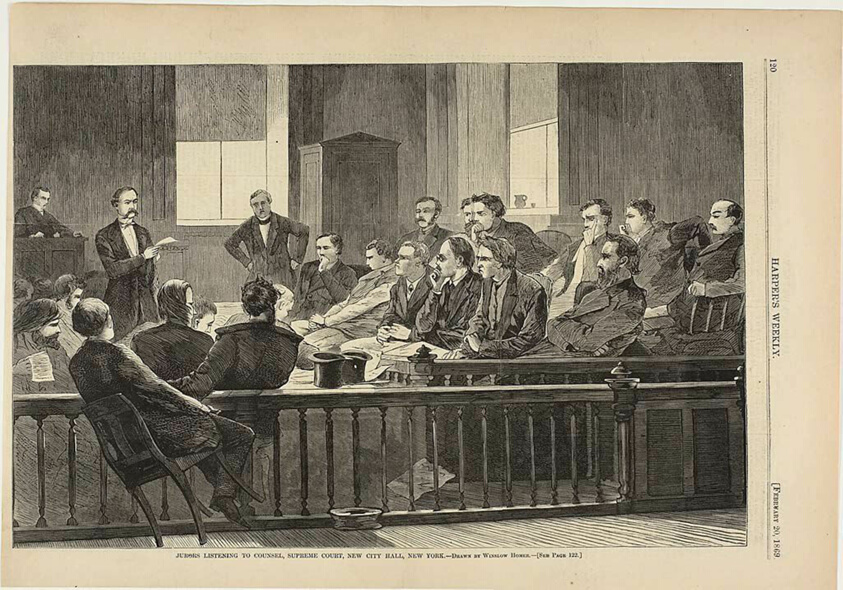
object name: Print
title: Jurors Listening to Counsel, Supreme Court, New City Hall, New York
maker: Winslow Homer (American, 1836-1910); published by Harper's Weekly (American, 1857-1916)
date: published February 20, 1869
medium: Wood engraving on paper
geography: United States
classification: wood engraving; print; prints and drawing